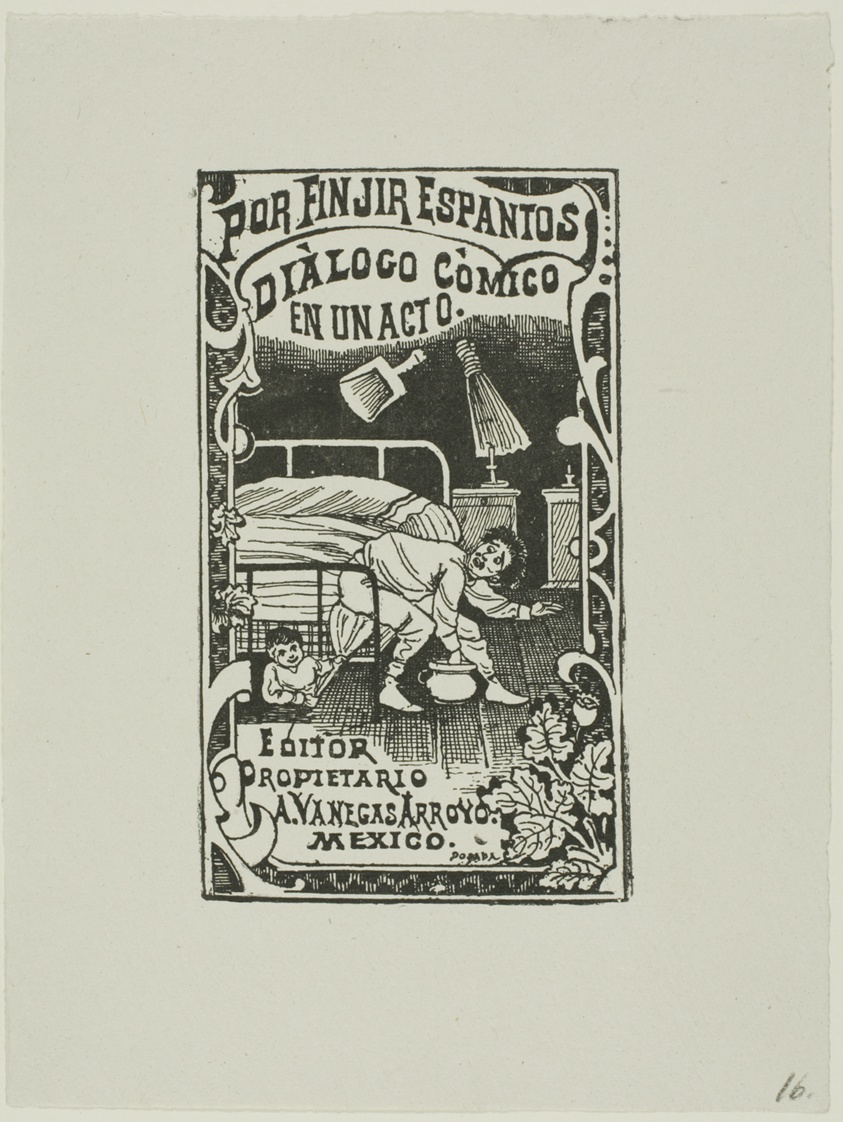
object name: Print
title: Pretending to be Ghosts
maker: José Guadalupe Posada (Mexican, 1852-1913)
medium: Relief etching on zinc on paper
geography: Mexico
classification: relief etching; print; prints and drawing